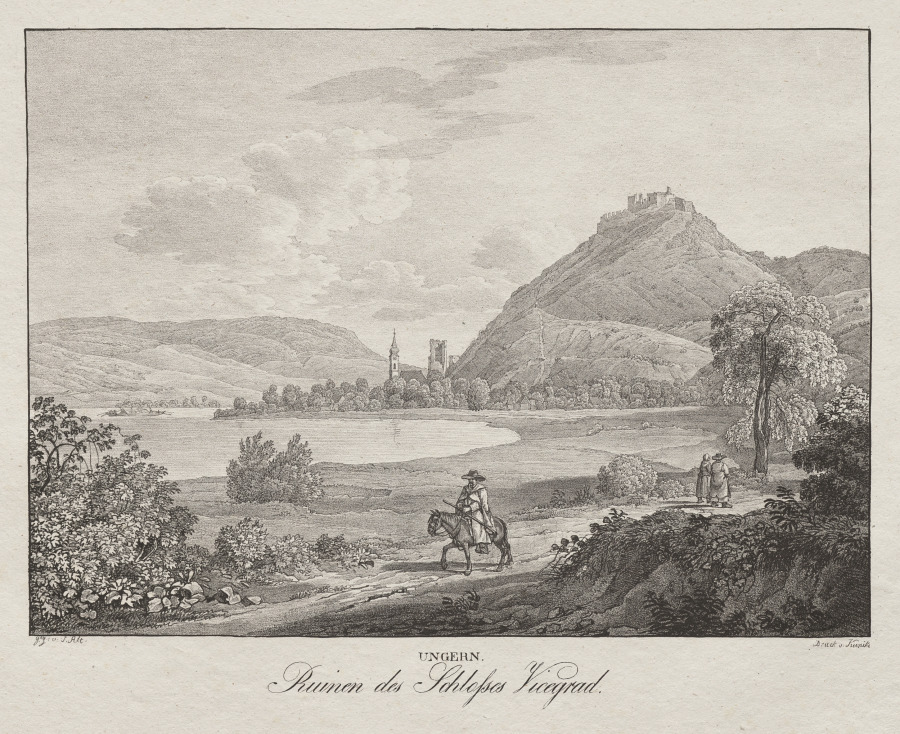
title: Ungern, Ruinen des Schlosses Vicegrad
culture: Austria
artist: Jakob Alt (Austrian, 1789–1872)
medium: lithograph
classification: Print